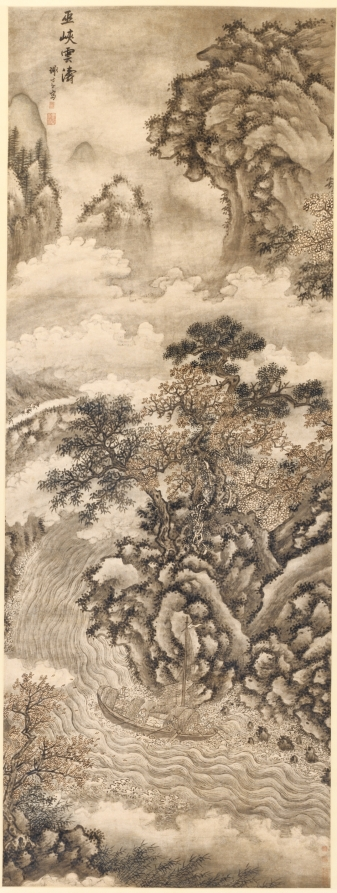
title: Clouds and Waves at the Wu Gorge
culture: China, Ming dynasty (1368–1644)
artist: Xie Shichen (Chinese, 1487–after 1567)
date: c. 1547–67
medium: hanging scroll; ink and light color on paper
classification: Painting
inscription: "巫峽雲濤" 謝時臣寫 [印] 姑蘇台下逸人; 樗仙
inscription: 5 additional seals of Cheng Qi 程琦 (1911–1988).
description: This dramatic landscape was probably painted after Xie Shichen returned from a journey in 1547 that took him through various provinces of China, including Sichuan Province in southwest China and sailing the Yangzi River. The composition from a high vantage point offers a view deep into the Wu Gorge where rolling waves put a ship in peril. The scale and composition of this landscape, which was inspired by the majestic mountain scenery in Sichuan Province, as well as Xie’s vigorous brushwork, are exceptional.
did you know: This large painting was likely created for a wealthy or powerful family's grand hall to impress their visitors.